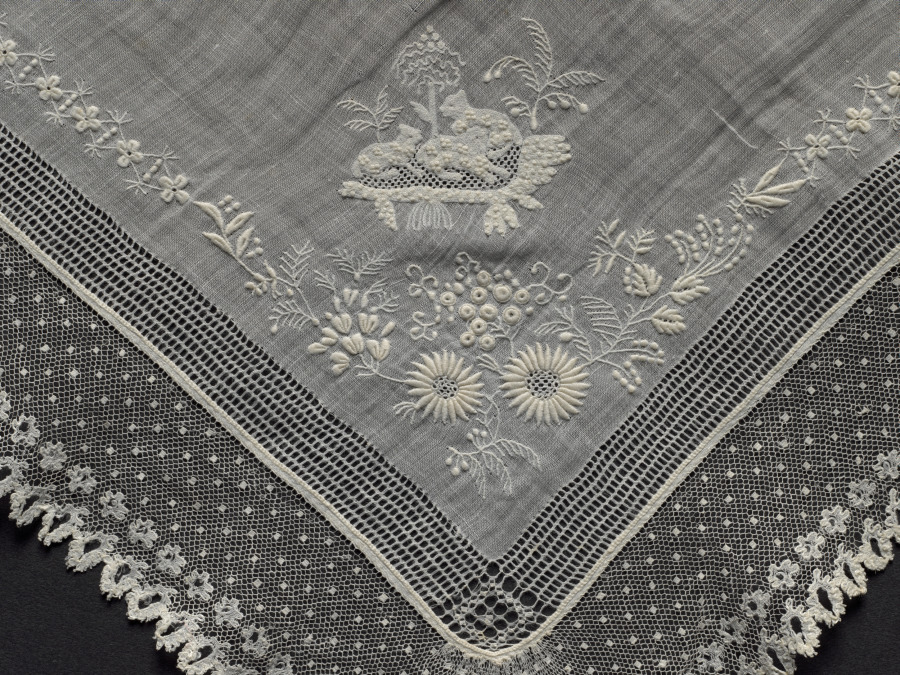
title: Lace Handekrchief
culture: France or Flanders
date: 1800–1820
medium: Plain weave linen ground: bobbin lace (Lille lace) edging and embroidery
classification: Embroidery